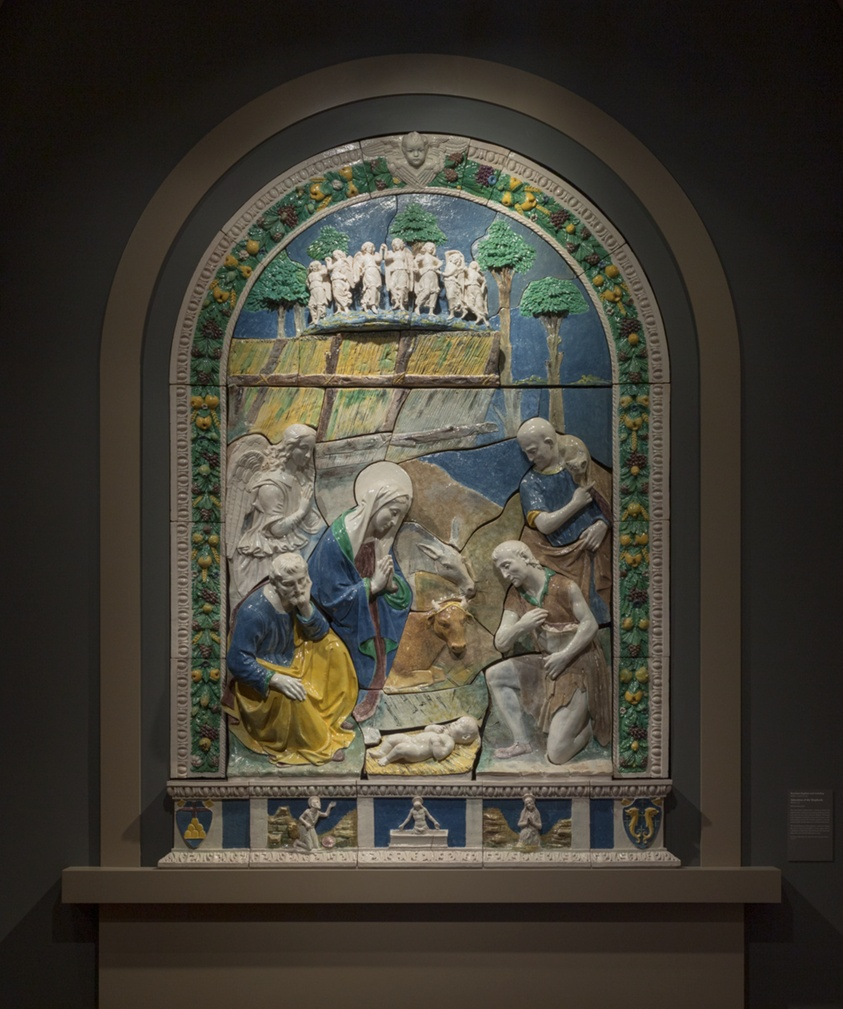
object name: Sculpture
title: Adoration of the Shepherds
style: sixteenth century, 16th Century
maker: Benedetto Buglioni (Italian, 1459/60–1520); Workshop of Benedetto Buglioni (Italian, 1459/60–1520)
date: c. 1520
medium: Glazed terracotta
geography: Italy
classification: large scale; terracotta (sculpture); Italian; sculpture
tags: holy family, women, woman, Virgin Mary, Virgin and child/Madonna and child, religious scenes, religious figures, religious, religion, men, Jesus, family, families, donkeys, cows, Christianity, Christian subjects, children, biblical, babies, animals, angels, blue, blue (color), yellow (color), green (color), grapes, coat of arms, wheat, foliage, Narrative, Devotion